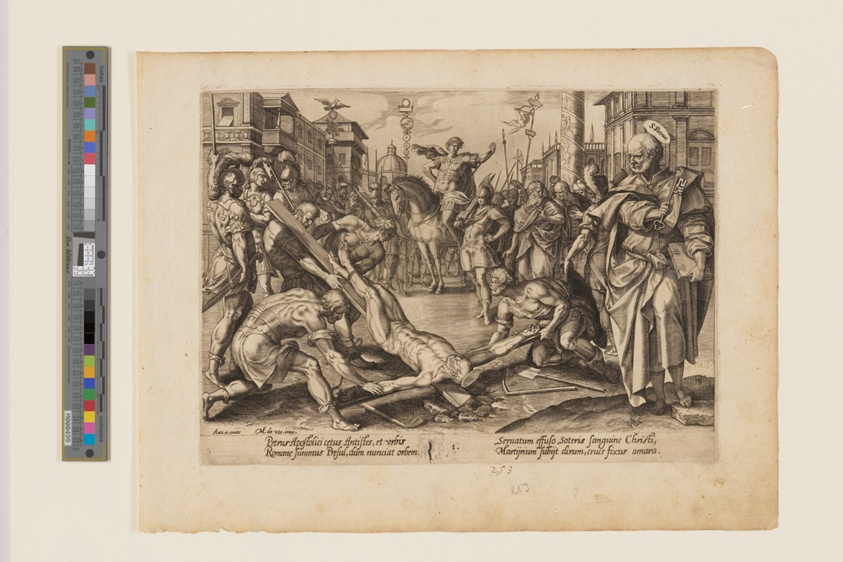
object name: Print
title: The Martyrdom of St Peter, from The Martyrdom of Christ and the Apostles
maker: Hendrick Goltzius (Dutch, 1558–1617); after Maarten de Vos (Flemish, 1532–1603); published Hieronymus Cock (Netherlandish, c. 1510–1570)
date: c. 1578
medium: Engraving on ivory laid paper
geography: Netherlands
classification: engraving; paper; print; prints and drawing